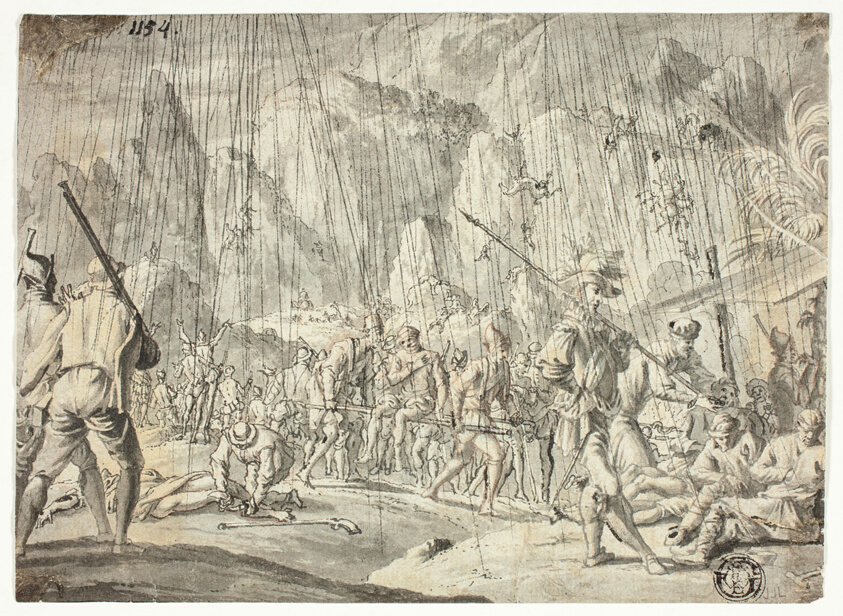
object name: Drawing and Watercolor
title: Battle Scene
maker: Attributed to Jan Luyken (Dutch, 1649-1712); or Jacques Callot (French, 1592-1635); or Caspar Luyken (Dutch, 1672-1708); or the circle of Abraham Jansz. van Diepenbeeck (Flemish, 1596-1675); or a follower of Hendrick Goltzius (Dutch, 1558-1617)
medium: Pen and black and brown ink, with brush and gray wash, on ivory laid paper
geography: Netherlands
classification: pen and ink drawings; drawings (visual works); prints and drawing